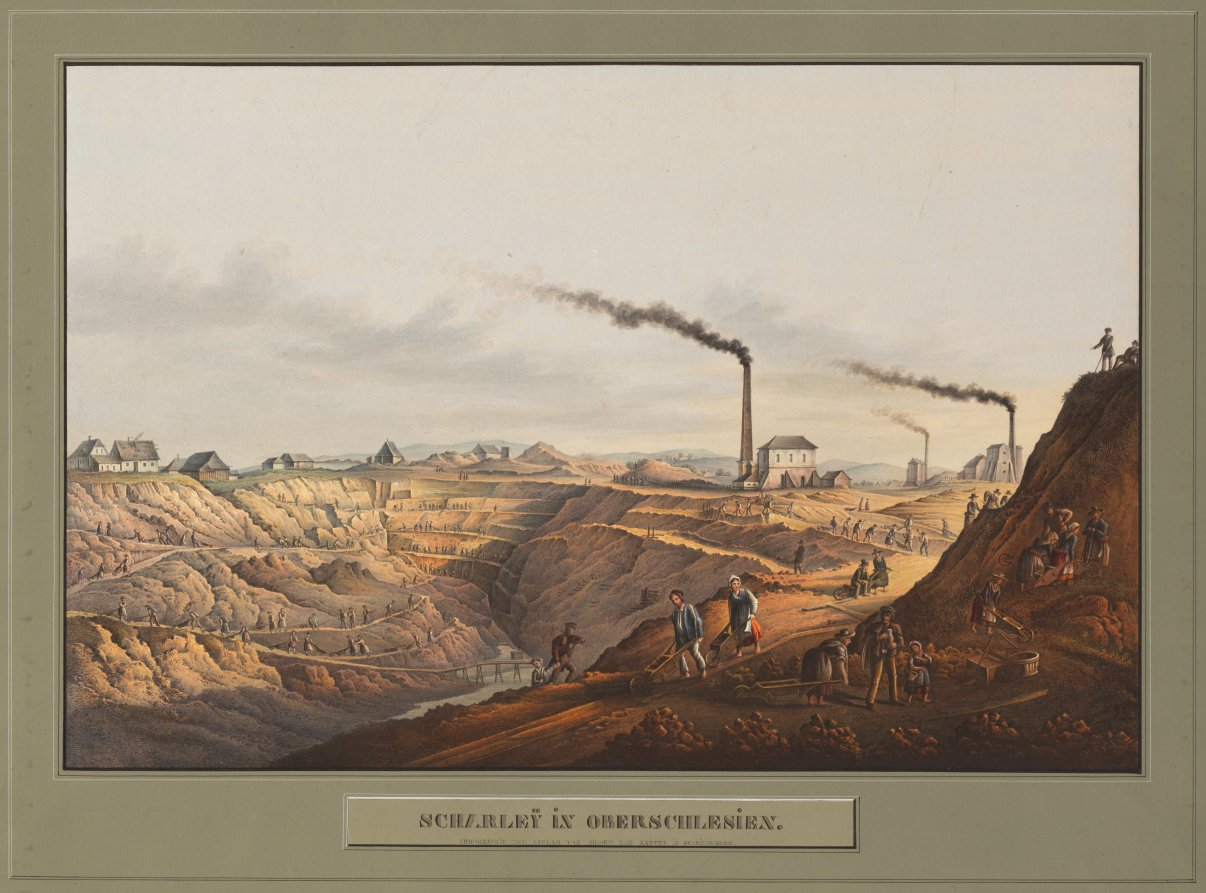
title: Scharley in Oberschleisien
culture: Germany, 19th century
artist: Carl Julius Rieden (German, 1802–1858)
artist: after Ernest William Knippel (German, 1811–1900)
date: c. 1850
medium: lithograph hand-colored with gouache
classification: Print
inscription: Label bottom margin: "SCHARLE IN OBERSCHLESIEN. / LITHOGRAPHIE UND VERLAG VON RIEDEN UND KNIPPEL IN SCHMIEDEBERG"